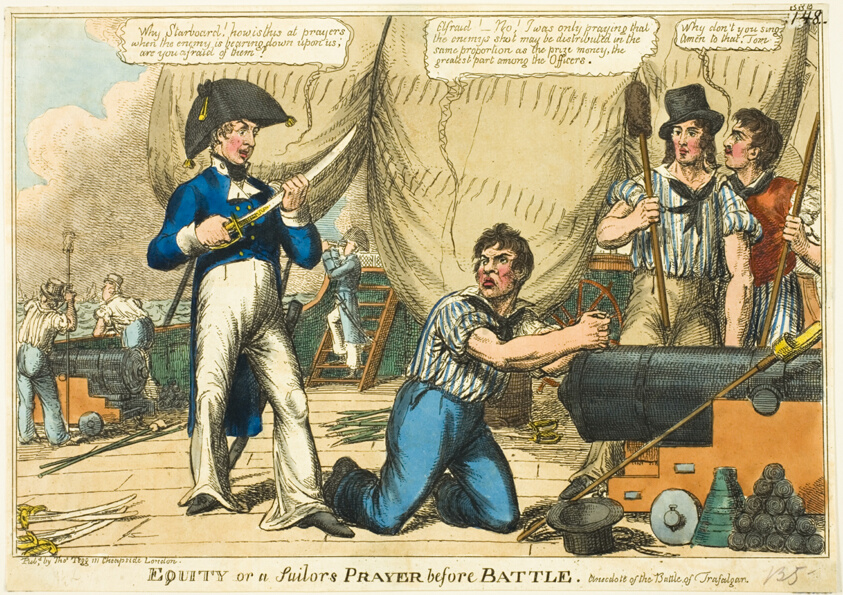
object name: Print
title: Equity, or a Sailor's Prayer before Battle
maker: Charles Williams (English, active 1797-1830); published by Thomas Tegg (English, 1776-1845)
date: 1805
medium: Hand-colored etching on ivory wove paper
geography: England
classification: etching; print; prints and drawing